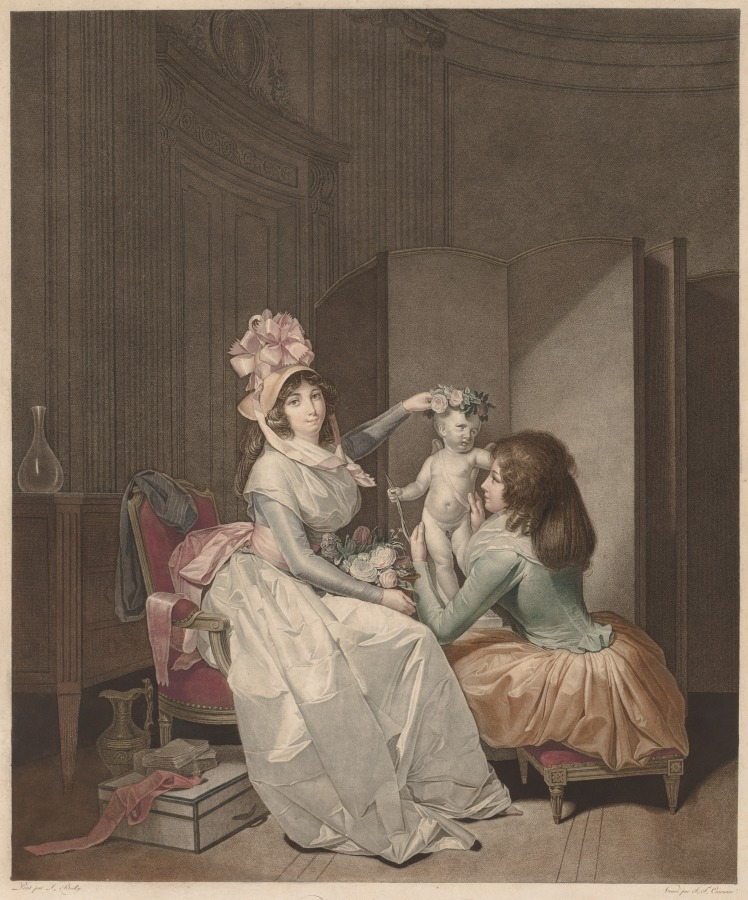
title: Love Crowned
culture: France, 19th century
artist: Frédéric Cazenave (French, active 1793–1843)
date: c. early 1800s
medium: stipple and line engraving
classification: Print